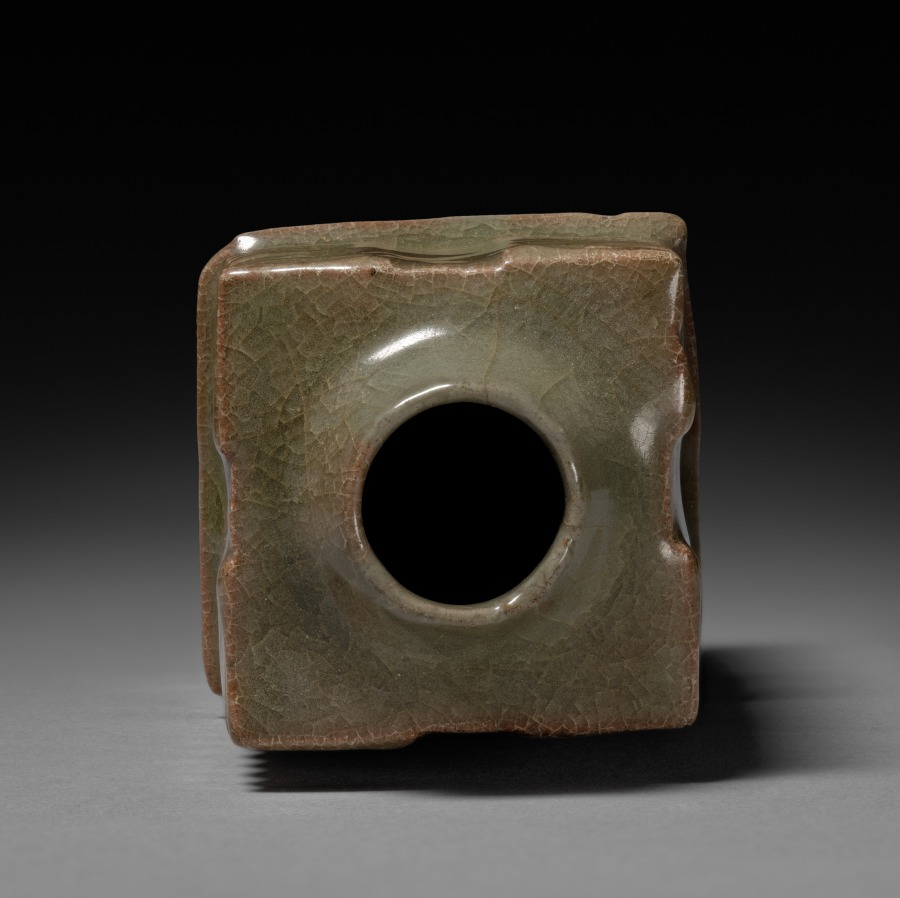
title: Vase in Shape of Cong: Southern Celadon Ware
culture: China, Zhejiang province, Yuan dynasty (1271-1368)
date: 1271–1368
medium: glazed buff stoneware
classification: Ceramic